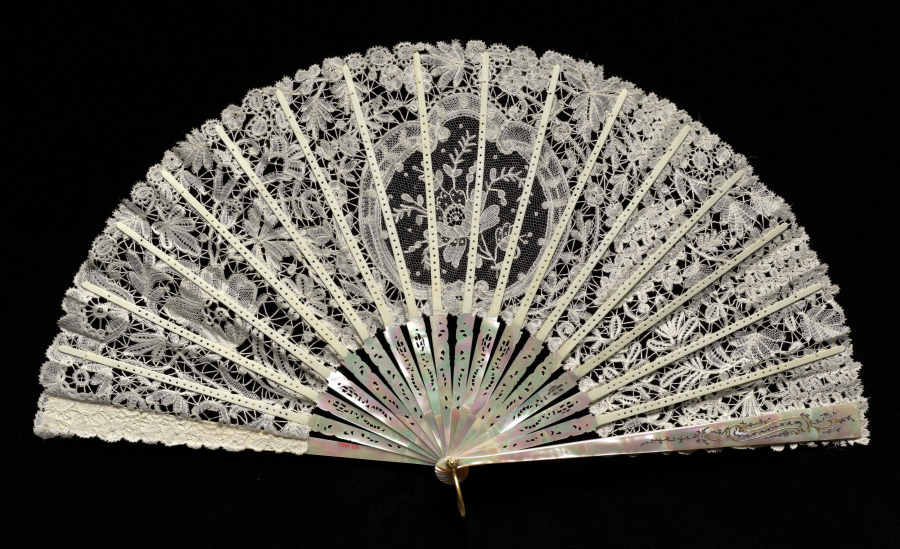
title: Lace Fan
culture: Belgium; Brussels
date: 1800s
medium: Linen: needle lace and bobbin lace (Point Duchesse)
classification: Lace